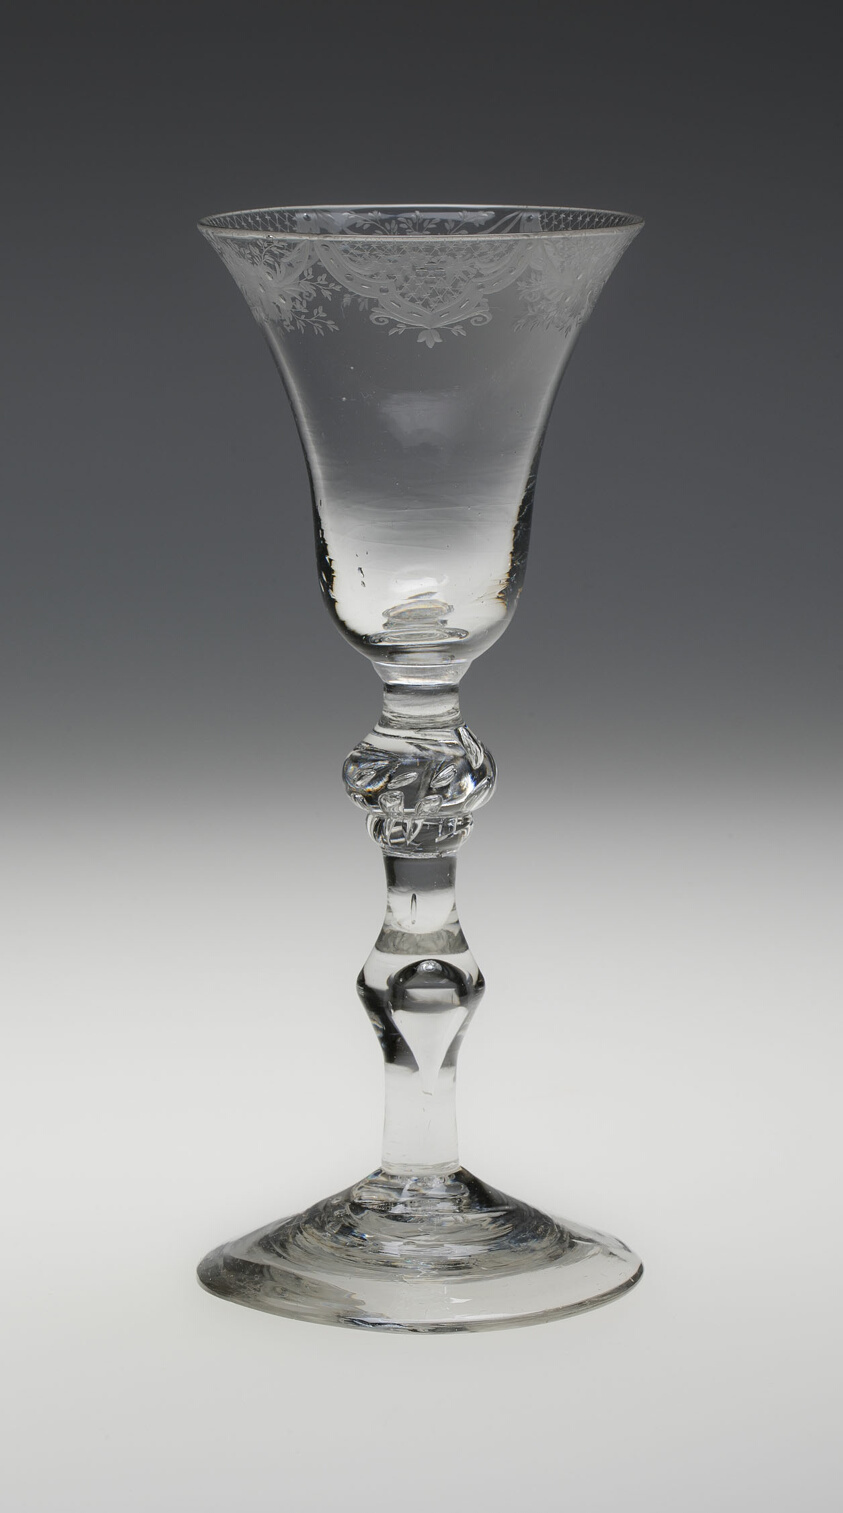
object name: Glass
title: Wine Glass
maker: England, Newcastle upon Tyne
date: c. 1745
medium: Glass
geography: England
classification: drinking vessel; european decorative arts; glass